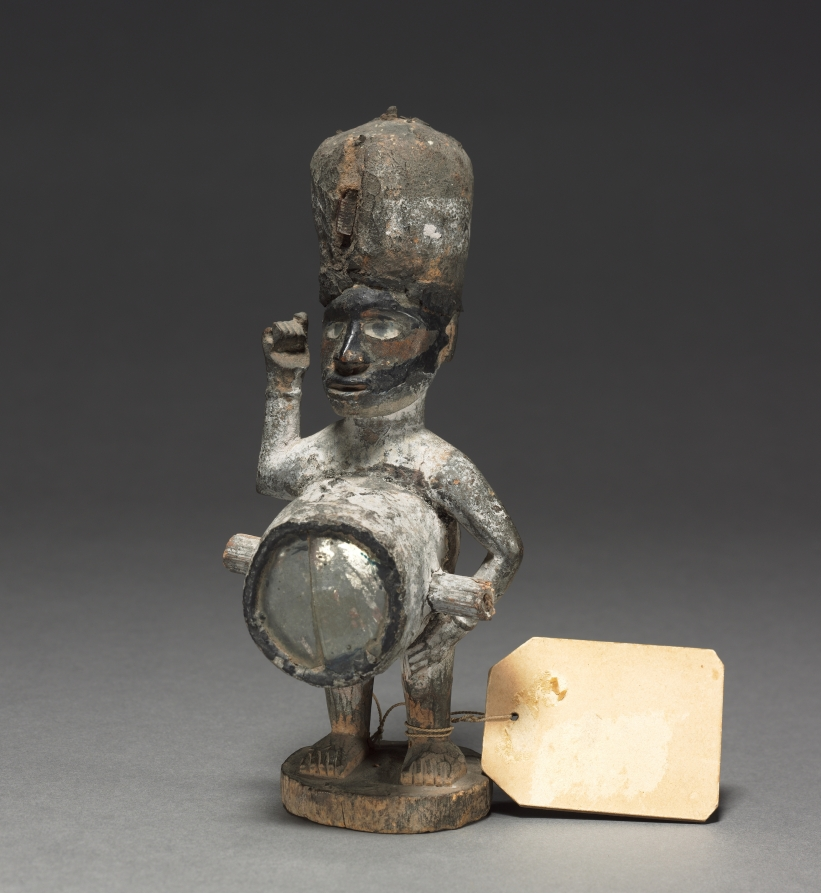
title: Power figure (nkisi)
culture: Central Africa, Republic of the Congo, Kongo people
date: late 1800s-early 1900s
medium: Wood, organic materials (including resin), probably kaolin, and metalized glass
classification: Sculpture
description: This figure is of the nduda type, characterized by the attached "guns" loaded with gunpowder and used to shoot witches. It is the only figure that adopts the threatening pose: the right hand raised, holding a spear or knife, and the left hand resting on the hip. Two guns protrude horizontally on both sides of the cylindrical medicine pack on the belly, covered with a round piece of mirror.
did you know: This is the only figure in a group of seven found in a French antique shop adopting a threatening pose.